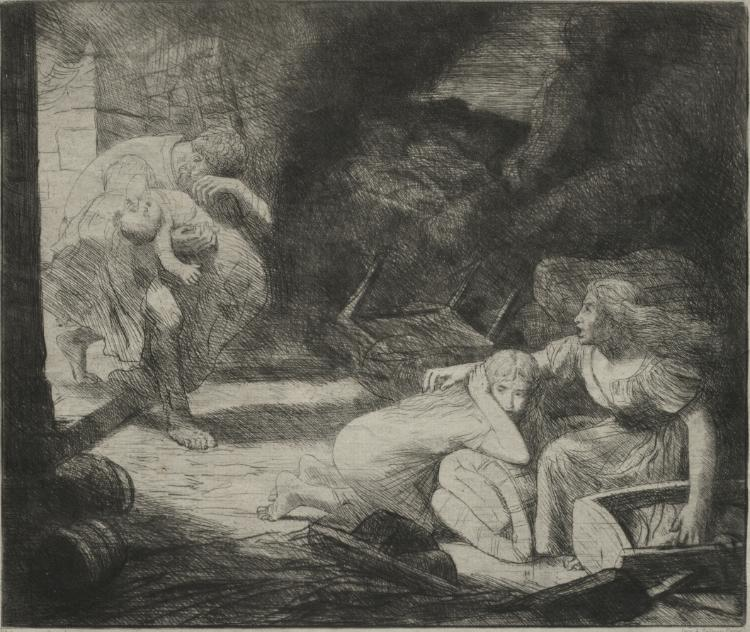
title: L'Incendie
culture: France, 19th century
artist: Alphonse Legros (French, 1837–1911)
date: 1876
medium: etching and drypoint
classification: Print